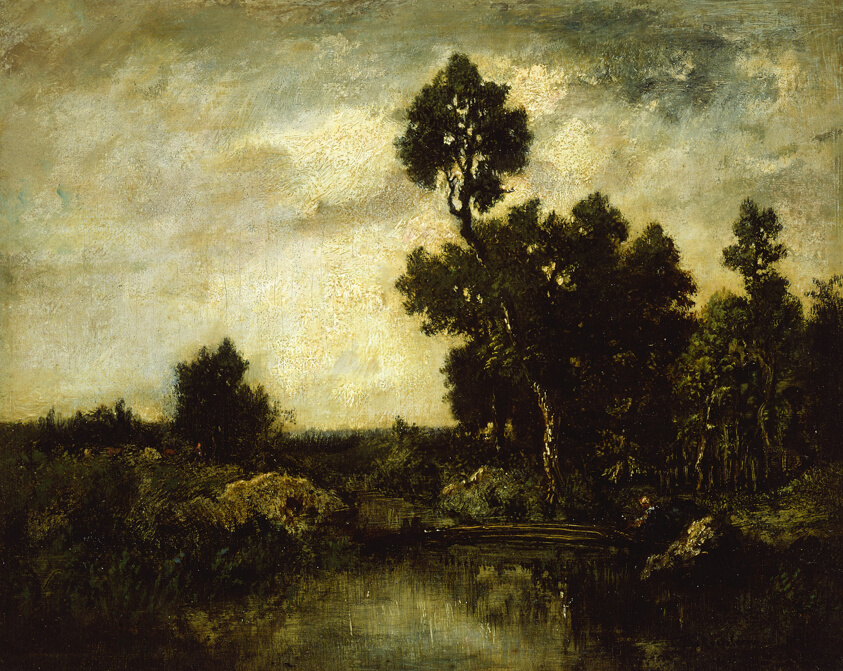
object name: Painting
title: Landscape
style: nineteenth century, 19th century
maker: Théodore Rousseau (French, 1812–1867)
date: c. 1850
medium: Oil on panel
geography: France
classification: painting; paint; oil paintings (visual works); french; european painting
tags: landscape, water, lake, wilderness, weather/seasons, trees, sky, nature, landscapes, foliage, clouds